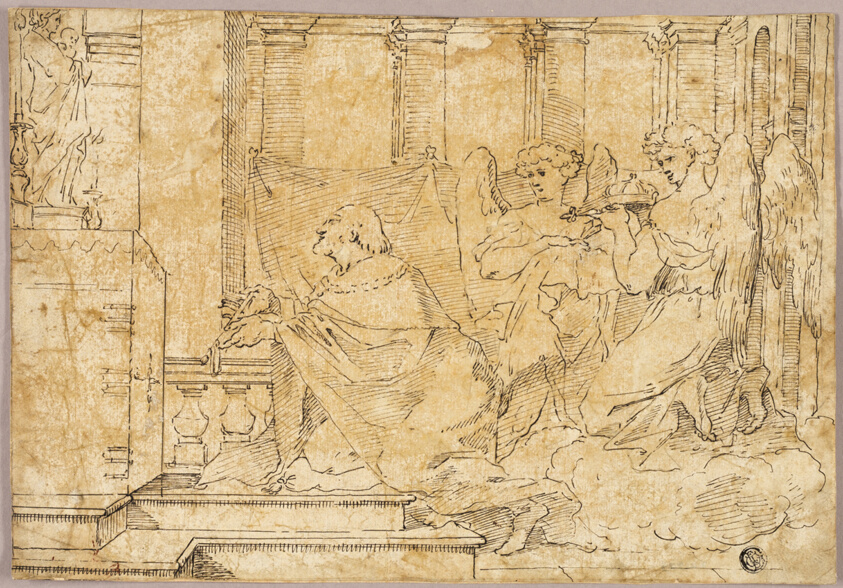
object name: Drawing and Watercolor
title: Saint Kneeling before Altar with Statue of Madonna and Child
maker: Style of Sébastien Bourdon (French, 1616-1671)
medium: Pen and black ink with graphite additions, on oil transparentized laid paper tipped onto cream laid paper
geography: France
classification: pen and ink drawings; drawings (visual works); prints and drawing